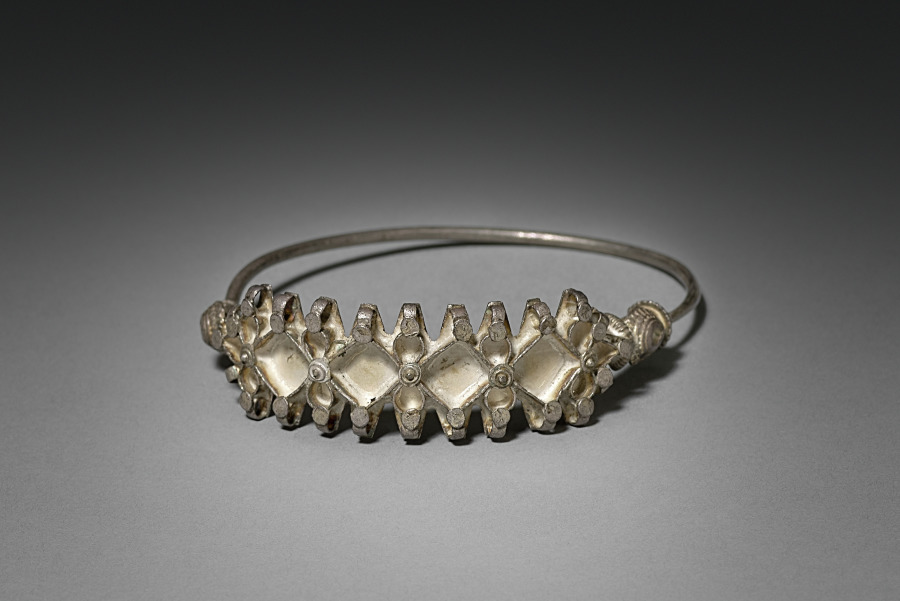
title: Nose Ring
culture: India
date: early 1900s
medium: silver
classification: Jewelry